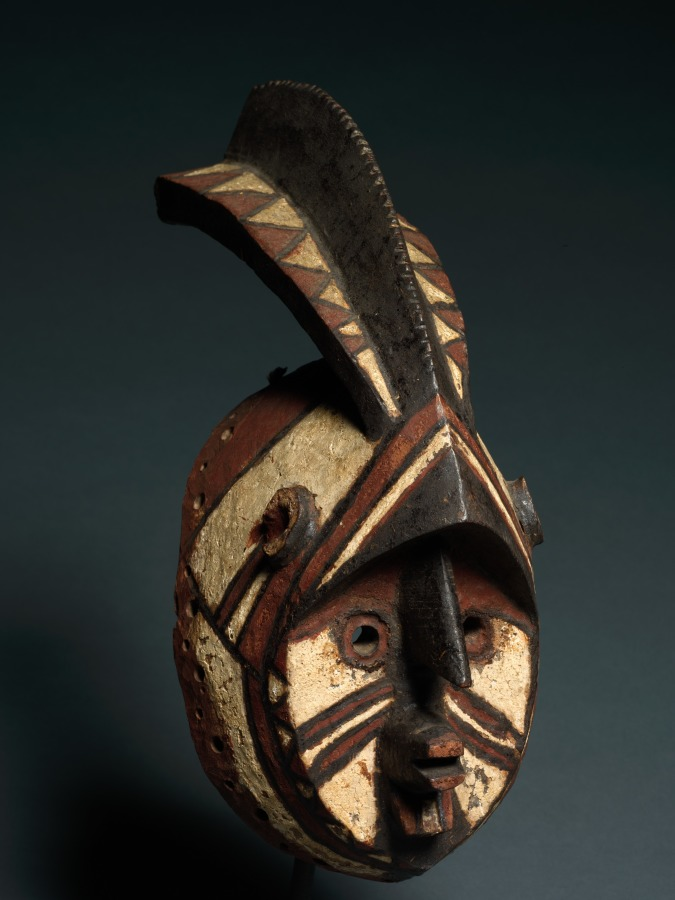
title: Mask (wan-balinga)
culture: Africa, West Africa, Burkina Faso, Mossi-style blacksmith-carver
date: early 1900s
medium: Wood and paint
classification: Mask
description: Only the farmers among the Mossi people employ masks. This mask’s proper name, wan-balinga, evokes a mythical figure who was the mother of the first Mossi ruler. Such masks are most typically worn and danced with on the occasion of the funeral of a male or female elder as escorts of the corpse to the grave. They also appear during annual memorial services that occur months after the actual burial, when all the deceased clan members are commemorated and honored.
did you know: This mask was worn and danced upon the death of an elder, escorting the corpse to the grave.